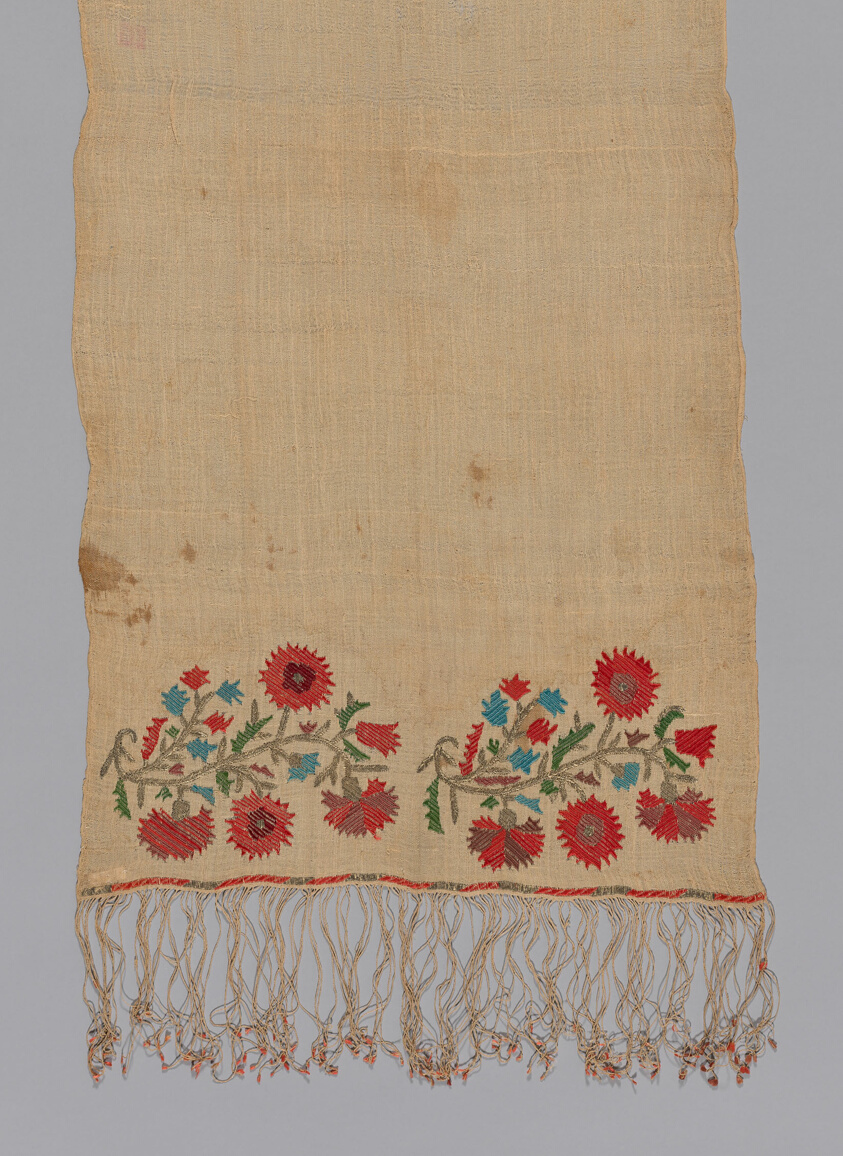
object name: Textile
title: Towel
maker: Greece, Northern Sporades Islands, possibly Lesbos, Mytilene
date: 18th century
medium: Linen, plain weave; embroidered with silk and gilt-metal-strip-wrapped silk in leaf, satin, and stem stitches; edged with plied warp fringe with silk tassels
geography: Sporádhes department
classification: textile; needlework (visual works)